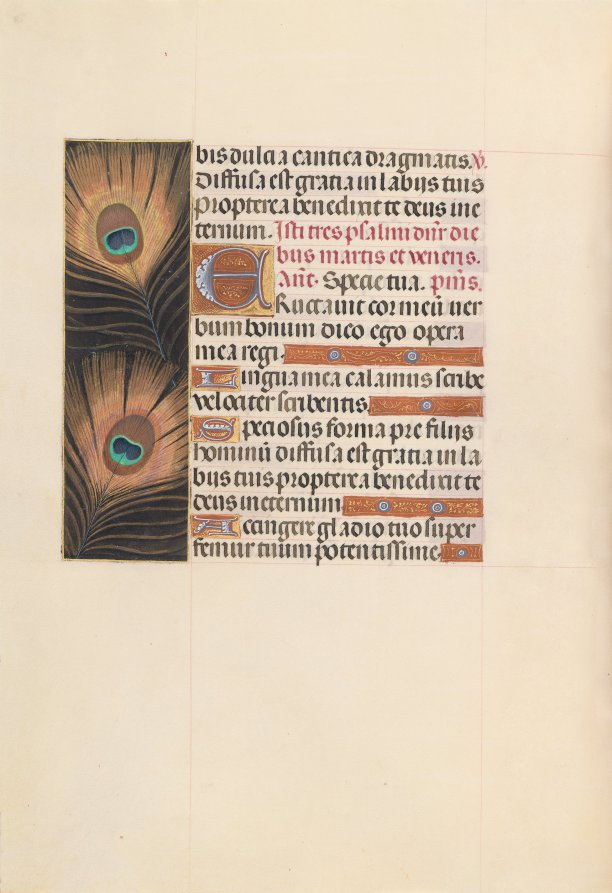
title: Hours of Queen Isabella the Catholic, Queen of Spain: Fol. 103v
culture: Flanders, Ghent and Bruges, late 15th century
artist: Master of the First Prayerbook of Maximillian (Flemish, c. 1444–1519)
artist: and Associates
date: c. 1500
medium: ink, tempera, and gold on vellum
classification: Bound Volume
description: This manuscript was illuminated by a circle of at least five highly organized manuscript painters active in the Flemish cities of Ghent and Bruges. The principal illuminator was Alexander Bening, who painted the majority of the book's miniatures. Manuscripts produced by this circle of artists are renowned for the decoration of their borders, which typically feature a rich variety of realistically-painted flowers, birds, and butterflies. This prayer book, called a book of hours, was intended not for a cleric, but for the private devotions of a lay person-in this case, Isabella the Catholic, Queen of Spain (1451-1504). Isabella's coat of arms embellishes the book's frontispiece. It is unlikely that the book was commissioned by the Queen herself; rather, she probably received it as a diplomatic gift from someone courting her patronage, perhaps Cardinal Francisco Jimenez de Cisneros. A Franciscan friar, Jimenez was dependent upon Isabella for his advancement, first to the post of Queen's confessor in 1492, and then to Archbishop of Toledo in 1495.